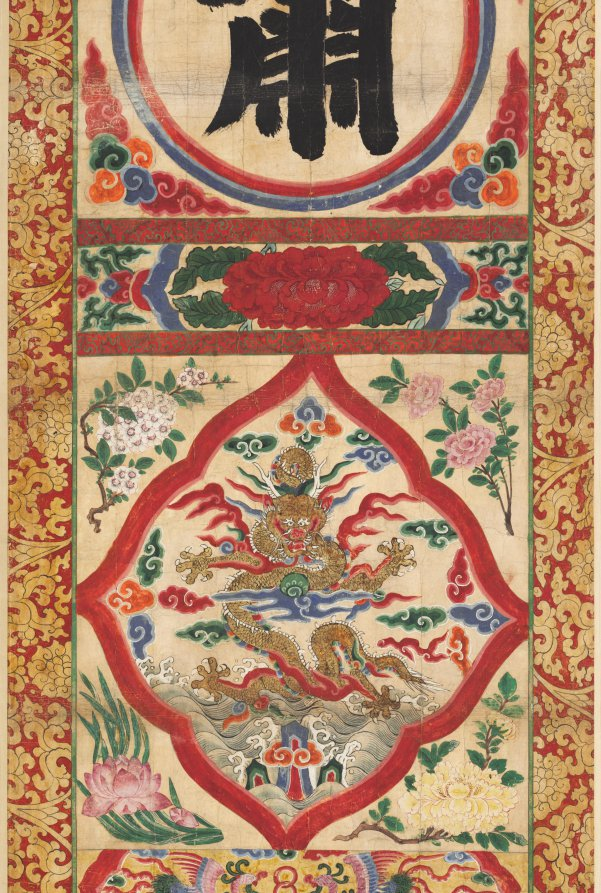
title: Painted Panel of Character "Whistle"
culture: Korea, Joseon dynasty (1392–1910)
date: early 1900s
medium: hanging scroll, ink and color on paper; unmounted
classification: Painting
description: This set of four colorful hanging scrolls may have been used in an outdoor Buddhist ritual to evoke heavenly blessings. Each hanging scroll bears four different character; tiger, dragon, whistle, and recite. Traditionally, tiger and dragon belong to the four directional guards, respectively west and east.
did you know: This set of four colorful hanging scrolls may have been used in an outdoor Buddhist ritual to evoke heavenly blessings.